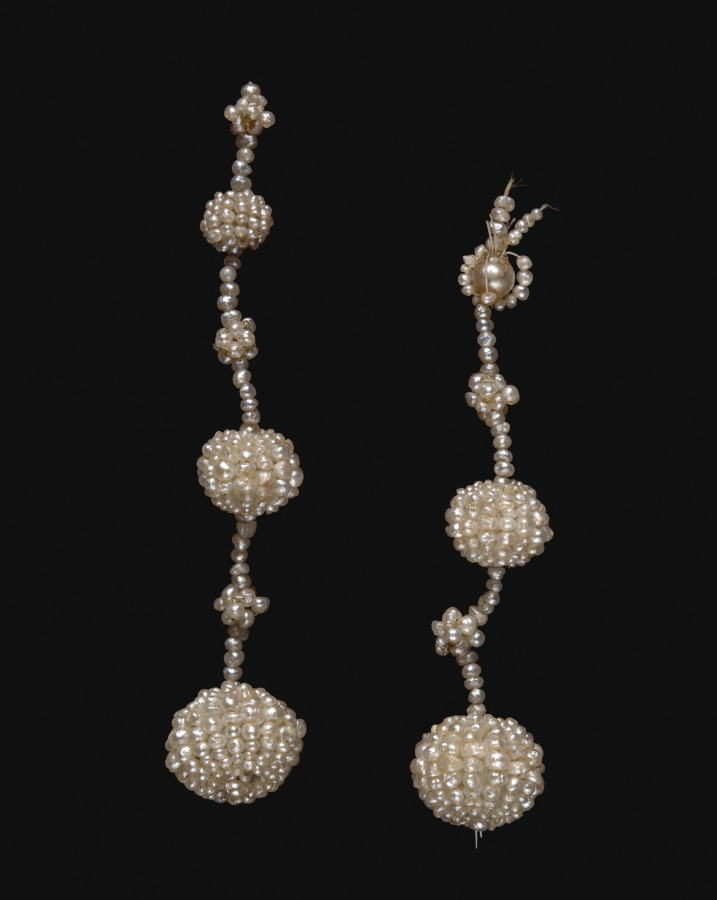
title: Pair of Earrings (Parure)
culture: England, 19th century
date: c. 1850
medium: seed pearl on Mother-of-Pearl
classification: Jewelry